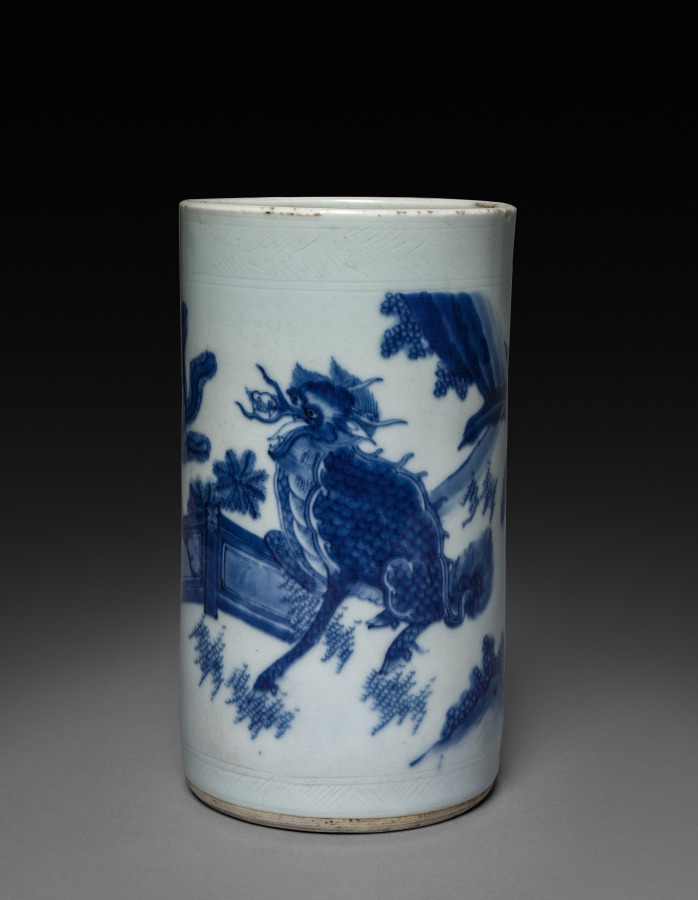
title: Brush Holder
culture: China, Jiangxi Province, Jingdezhen kilns, "Transitional period," Ming dynasty (1368–1644), Chongzhen reign (1628–1644)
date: 1628–44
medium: porcelain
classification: Ceramic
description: This porcelain brush holder is considered to have been made in the "Transitional period," a term used to define the period between about 1620 and 1683 when official kilns in Jingdezhen were no longer under imperial supervision due to the transition from the Ming to the Qing dynasties.